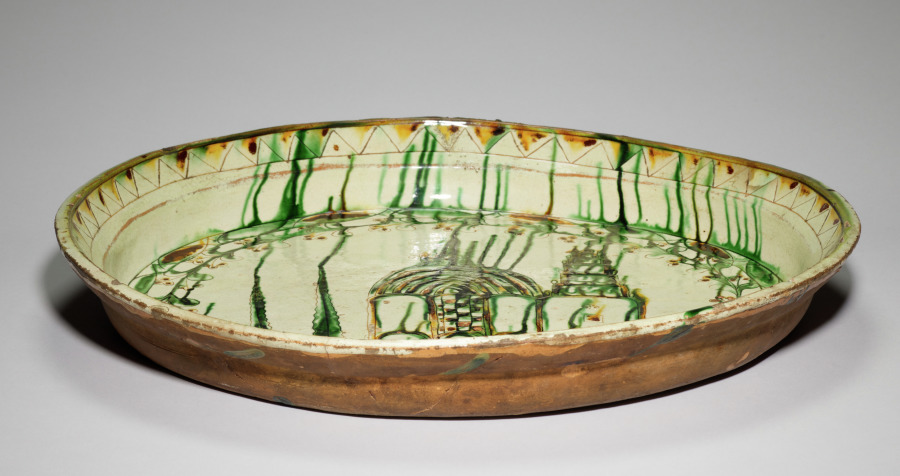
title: Plate: Majolica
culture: Mexico, 18th century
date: 1700s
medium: tin-glazed earthenware (maiolica)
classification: Ceramic